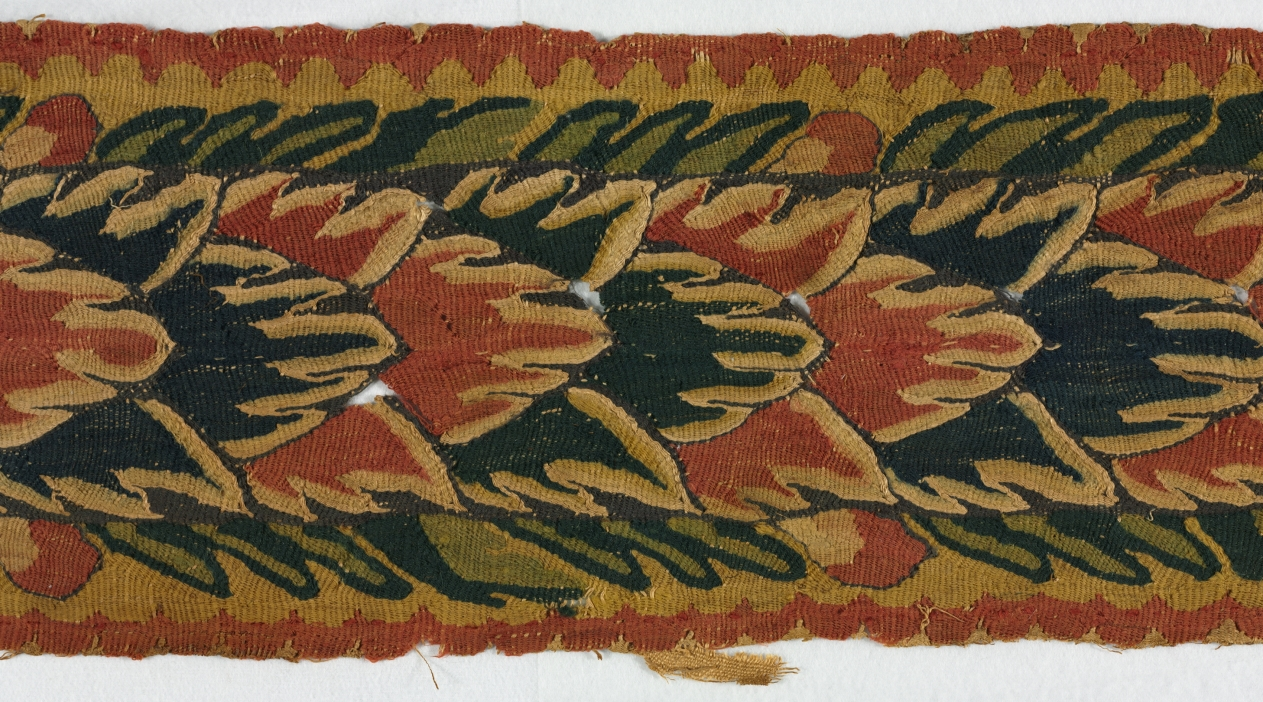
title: Panel from a Large Curtain, Overlapping Leaves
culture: Egypt, Byzantine period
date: 300s–400s CE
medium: Undyed linen and dyed wool: tapestry weave sewn on plain weave ground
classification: Textile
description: These colorful overlapping leaves with interspersed buds along the sides originally formed a decorative panel in a large curtain. Together with several similar designs, they alternated with areas of undyed linen decorated with scattered wool and linen tapestry-woven motifs. Although decorative motifs were often woven into the ground fabric, this panel was sewn on afterwards. During the late Roman and early Christian period curtains with woven or applied decoration were used in churches and Christian meeting rooms to separate the clergy from the congregation. They were also hung in doorways and between columns both inside and outside. Their importance is evident in numerous portraits of religious figures and laymen represented between curtained arches.